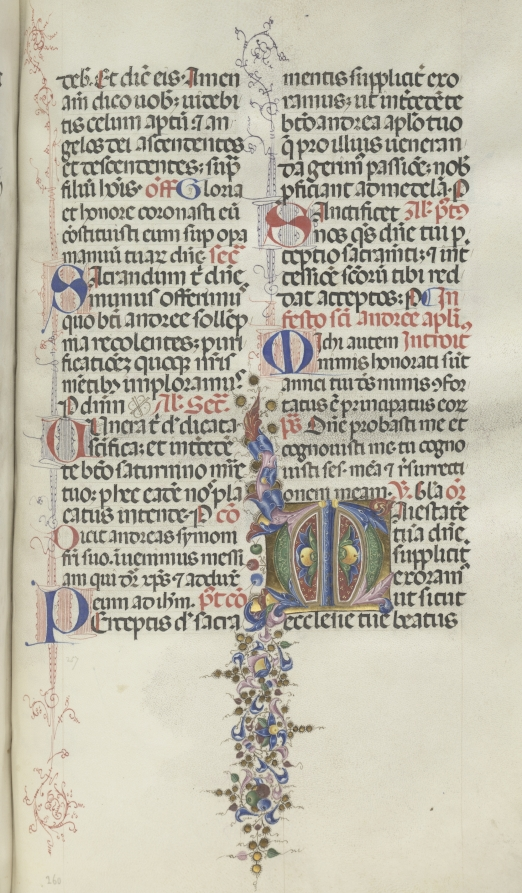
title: Missale: Fol. 260: Foliage with Fruit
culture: Italy, Perugia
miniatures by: Bartolommeo Caporali (Italian, c. 1420–1503)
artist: assisted by Giapeco Caporali (Italian, d. 1478)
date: 1469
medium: ink, tempera and burnished gold on vellum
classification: Bound Volume